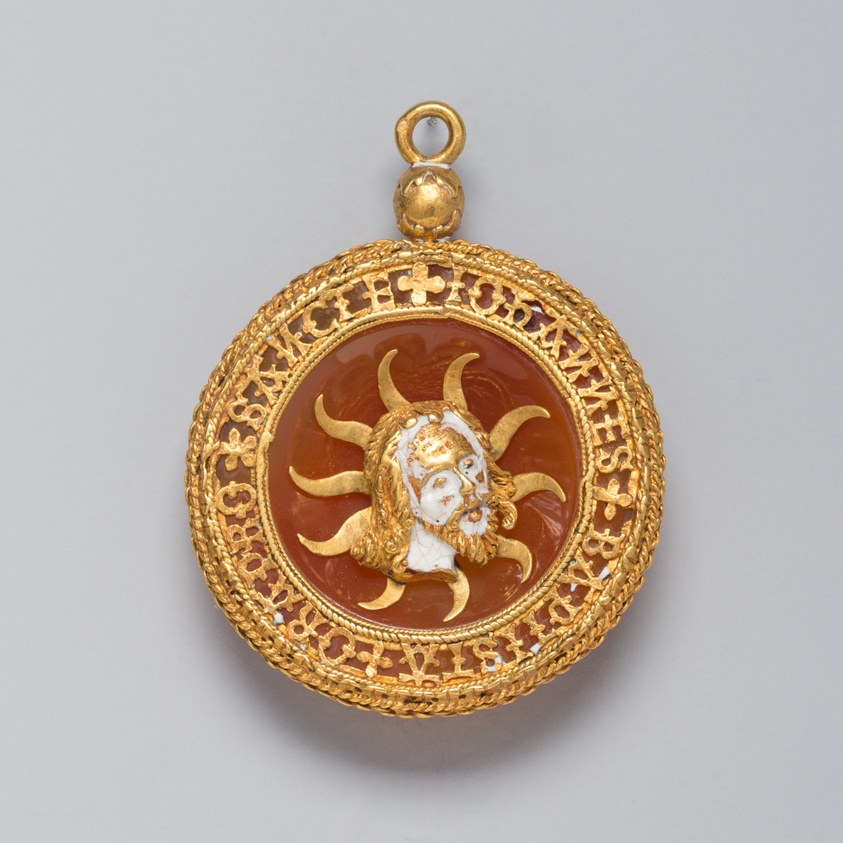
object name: Costume and Accessories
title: Hat Badge with the Head of Saint John the Baptist Adapted as a Pendant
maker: French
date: c. 1500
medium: Gold, carnelian, and enamel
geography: France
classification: pendant (jewelry); jewelry; european decorative arts; costume